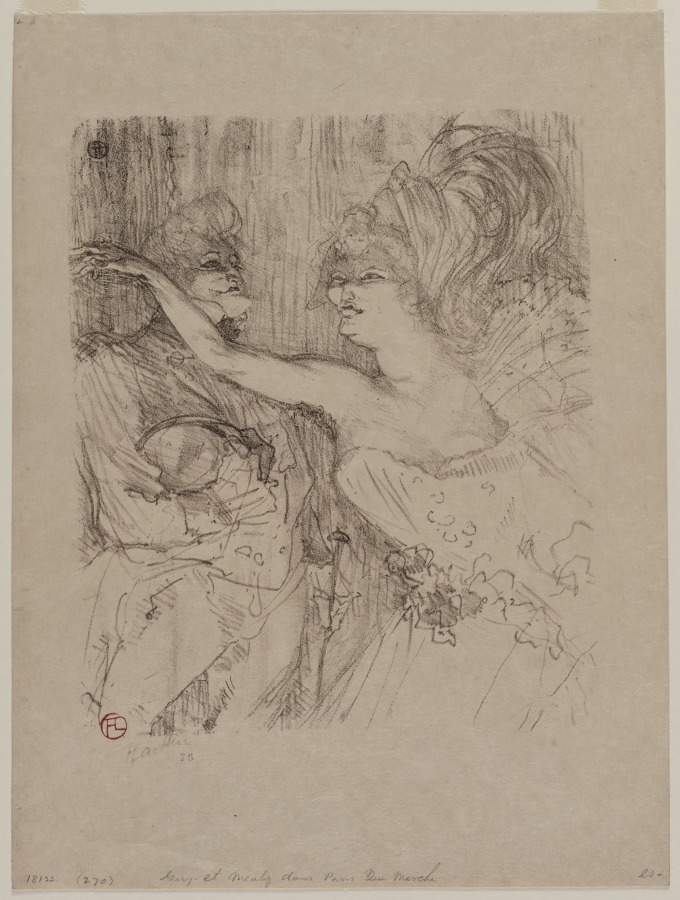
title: Guy and Mealy, in "Paris qui Marche"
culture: France, 19th century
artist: Henri de Toulouse-Lautrec (French, 1864–1901)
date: 1898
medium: lithograph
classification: Print